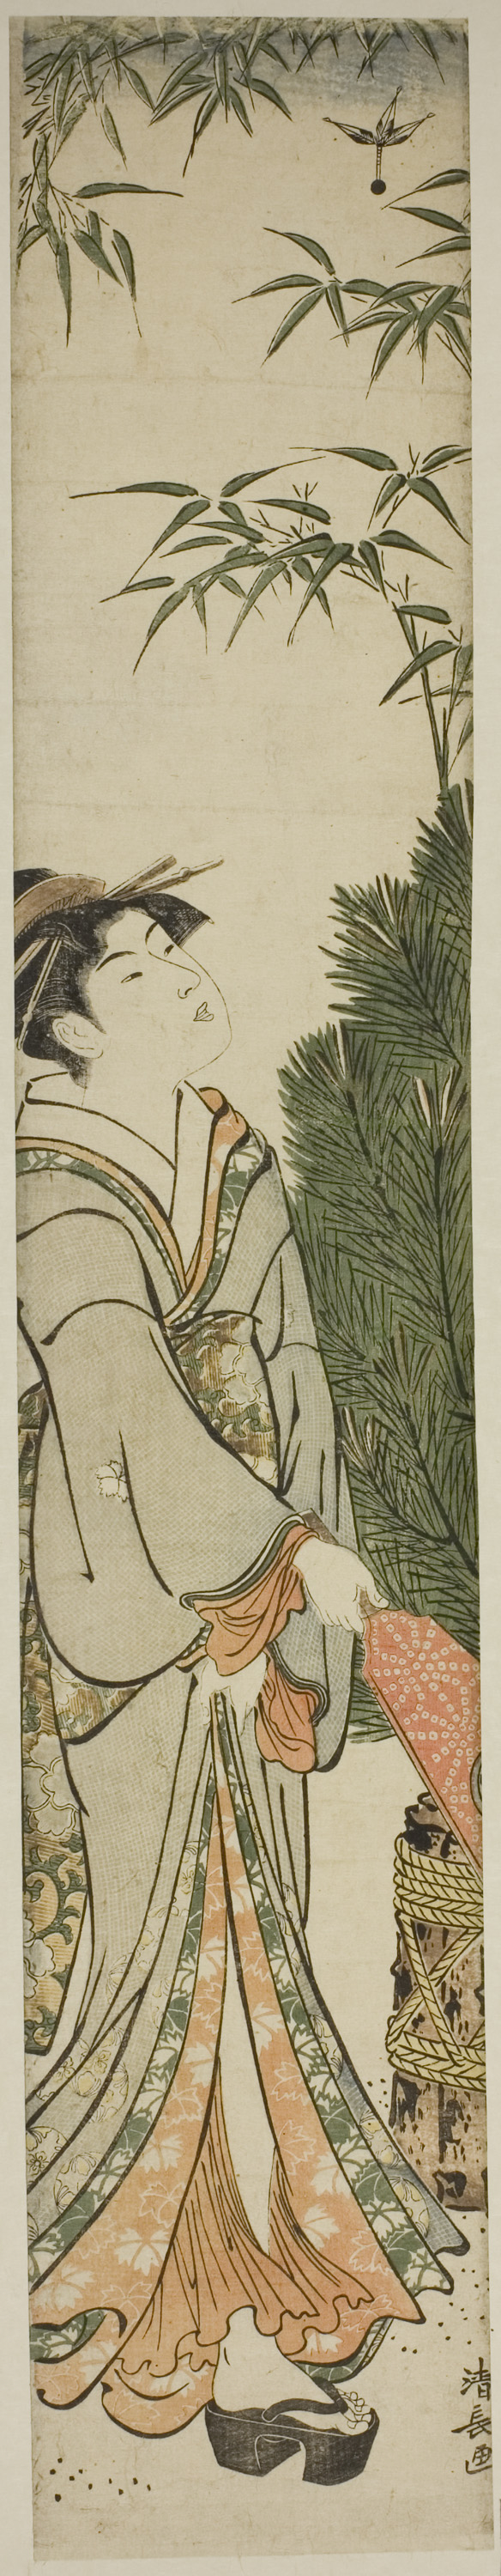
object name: Print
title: Geisha Playing Battledore and Shuttlecock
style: Japanese (culture or style)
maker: Torii Kiyonaga (Japanese, 1752-1815)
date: c. 1783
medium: Color woodblock print; hashira-e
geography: Japan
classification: woodblock print; print; asian art